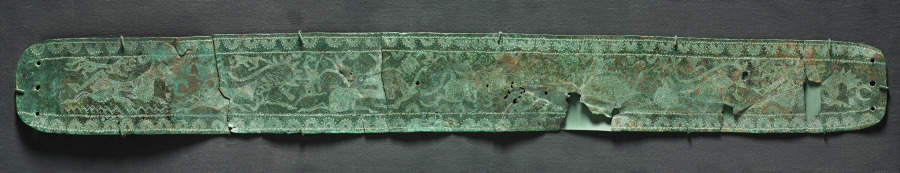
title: Running Animals Belt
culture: Caucasus, Russia or Turkey, Koban culture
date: c. 1000 BCE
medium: bronze, hammered and incised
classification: Metalwork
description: The design is one of running and leaping animals "drawn" with an elegance, vigor, and power reminiscent of those cultures who have lived most closely with wild animals and therefore appreciated them best, such as, for one example, the Neolithic cave painters of Lascaux. The animal figures on the belt are not actually drawn, but are punched with an extremely fine punch tool in very carefully planned lines that actually look as though they are drawn. This was a technique used in about 1000 BC.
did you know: The Scythians arose from nomadic tribes that wandered from the steppes to eastern Europe; the greatest numbers of finds related to them have come from the areas around the Black Sea.